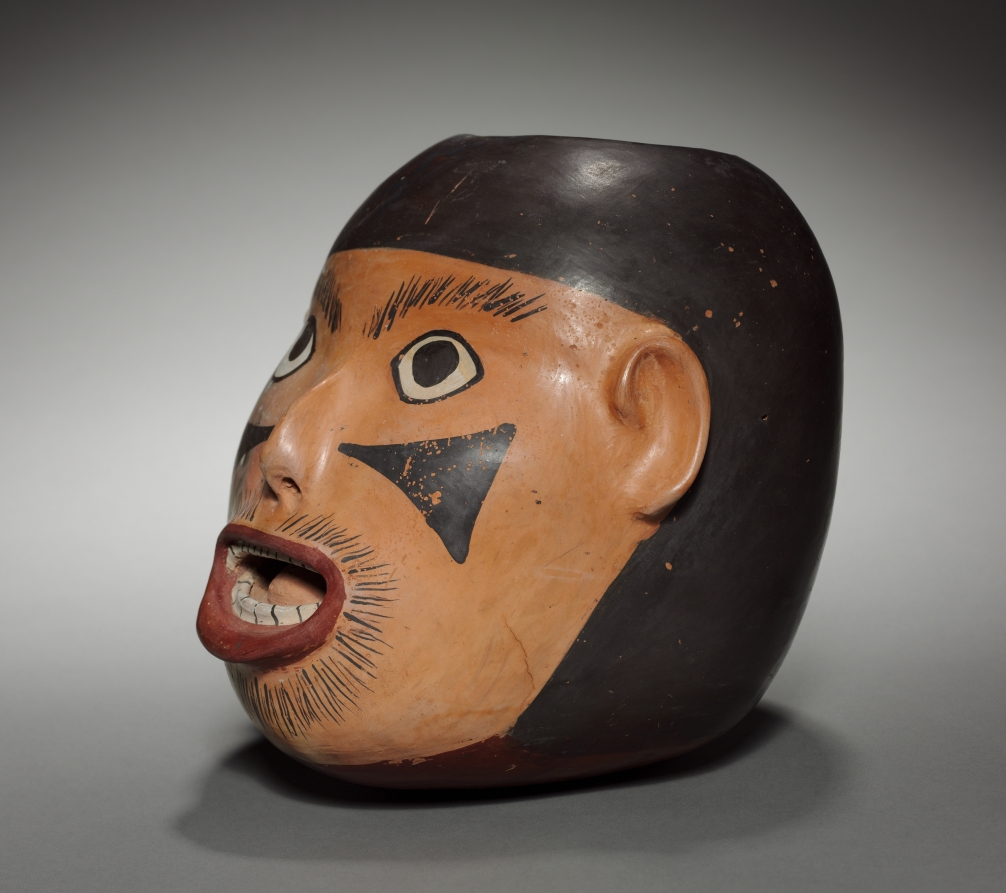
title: Severed Head Effigy Vessel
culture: Peru, South Coast, Nasca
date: c. 100–350 CE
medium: earthenware with colored slips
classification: Ceramic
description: The Nasca people were organized politically into small, competing chiefdoms, and warfare was common. This vessel represents a freshly severed human head (probably that of a captured and sacrificed prisoner) with staring eyes, gaping mouth, and blood-red underside. Modeling of the mouth cavity, tongue, and teeth lends the image a startling realism. Human sacrifice by decapitation was a central element of Nasca religion, essential to agricultural fertility. Severed heads were emptied and dried, then pierced through the forehead and suspended from a thick cord. Such preserved heads have been recovered from offering deposits and from tombs, where they were buried with their captors.